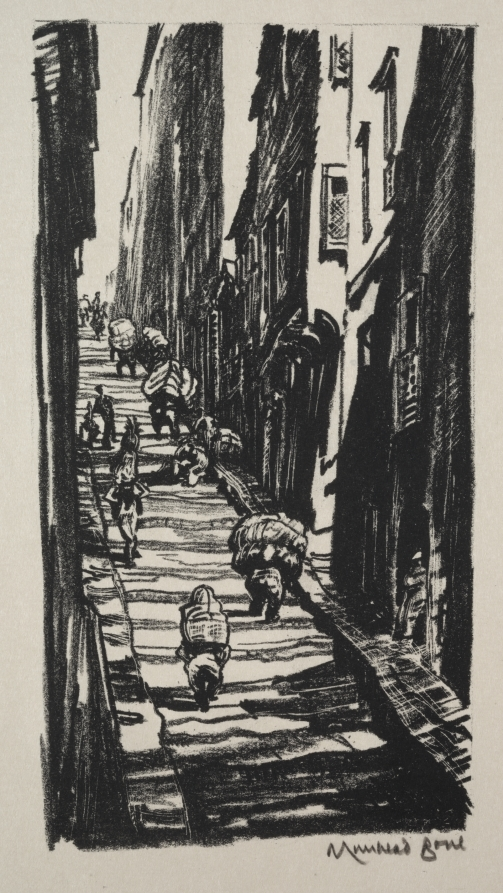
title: Carpet Porters, Pera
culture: England, 20th century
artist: Muirhead Bone (British, 1876–1953)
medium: lithograph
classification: Print